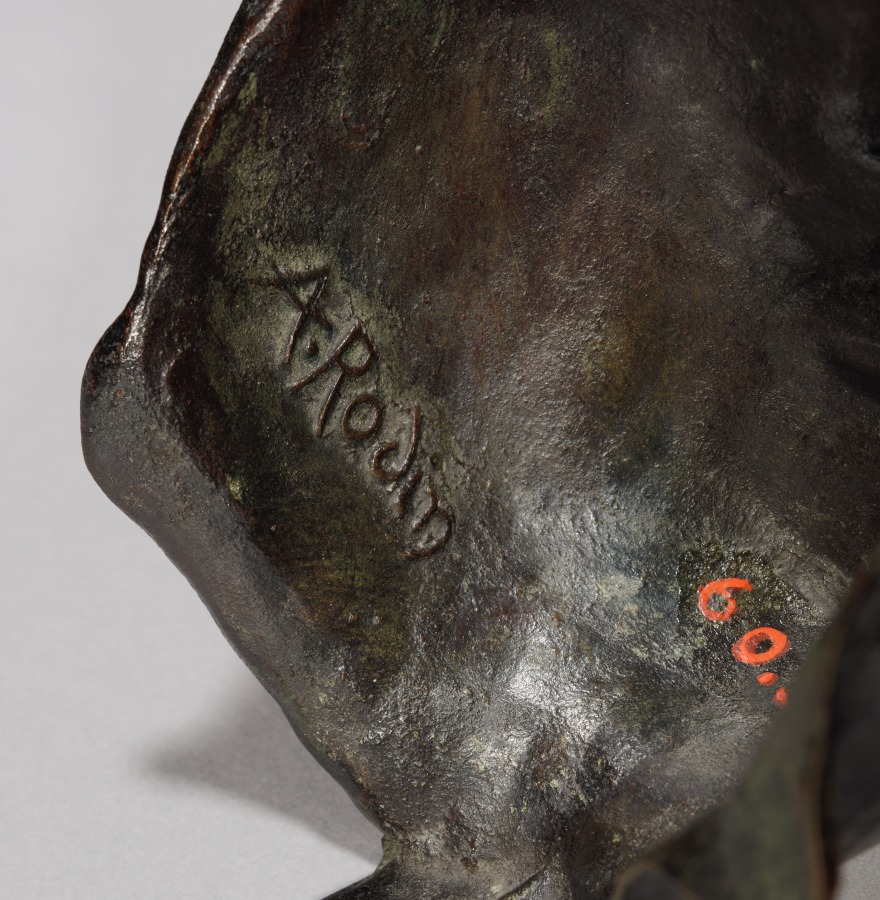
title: Mask of the Japanese Actress Hanako (Ohta Hisa)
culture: France, early 20th Century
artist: Auguste Rodin (French, 1840–1917)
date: 1908 (?)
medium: bronze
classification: Sculpture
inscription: Signed sinister side of neck: "A. Rodin"; inside sinister side in relief: "A. Rodin"